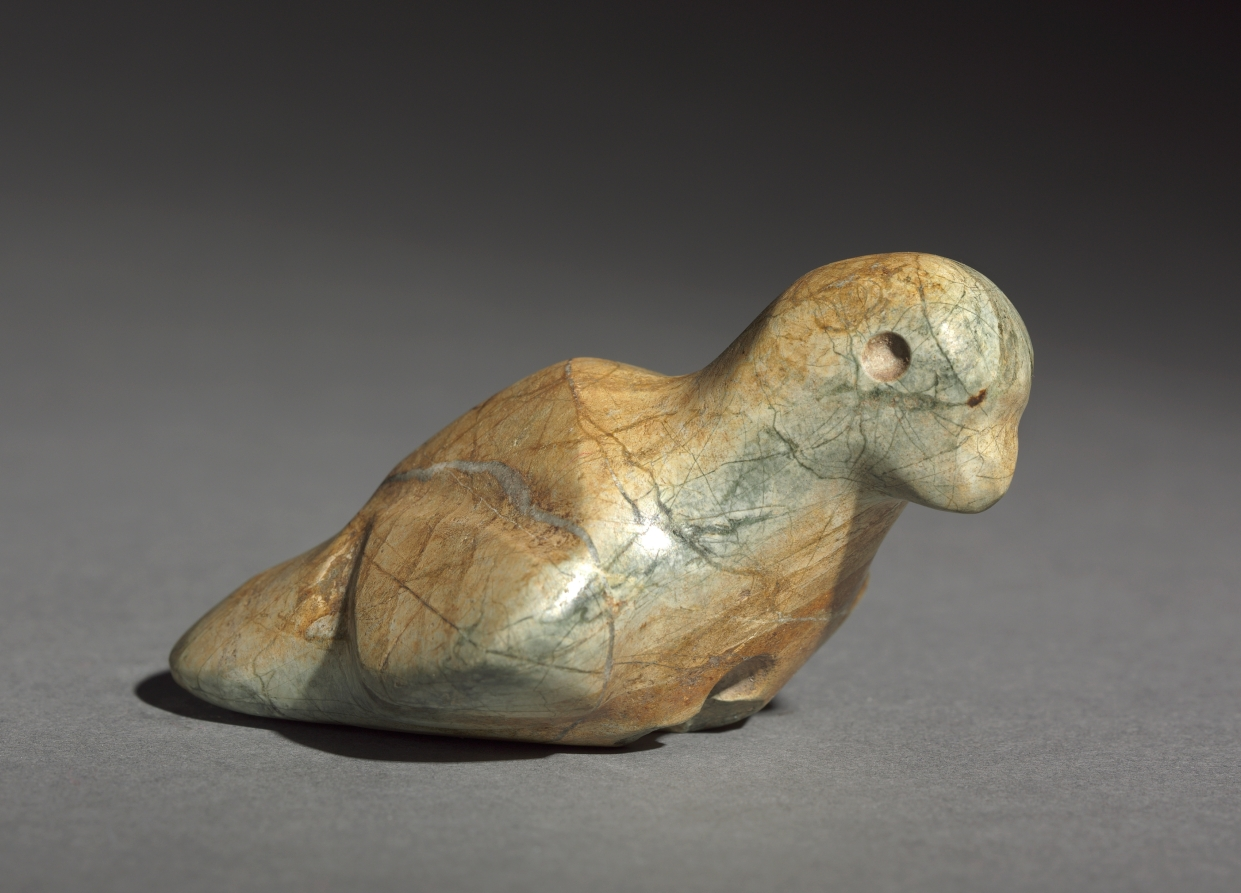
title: Bird Pendant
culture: Mesoamerica, Mexico, Guerrero, Mezcala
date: 100 BCE–300 CE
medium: polished gray-brown stone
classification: Sculpture